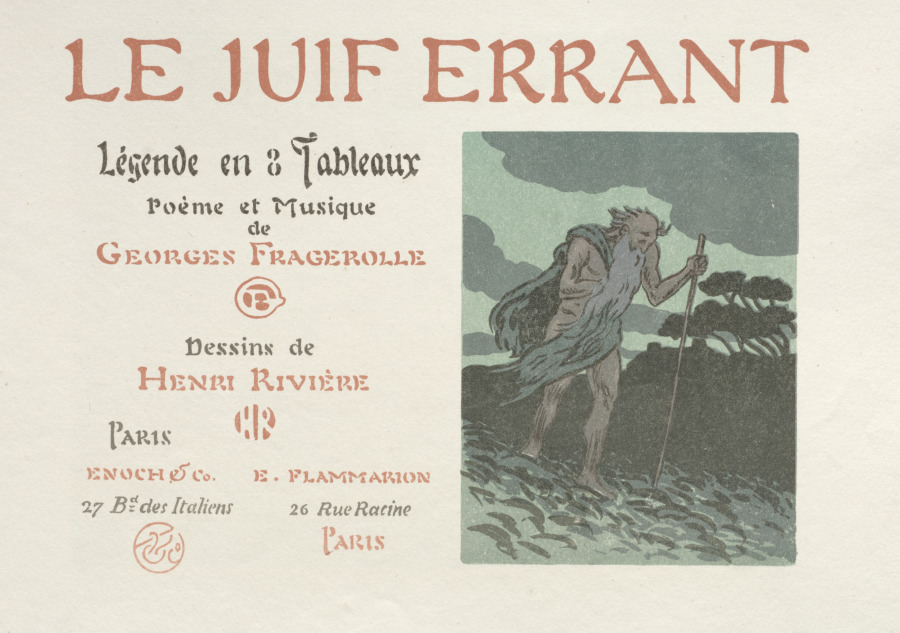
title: The Wandering Jew: Cover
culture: France, 19th century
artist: Henri Rivière (French, 1864–1951)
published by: Verneau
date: 1896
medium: color lithograph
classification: Portfolio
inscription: title page is signed, in blue crayon: Henri Rivière